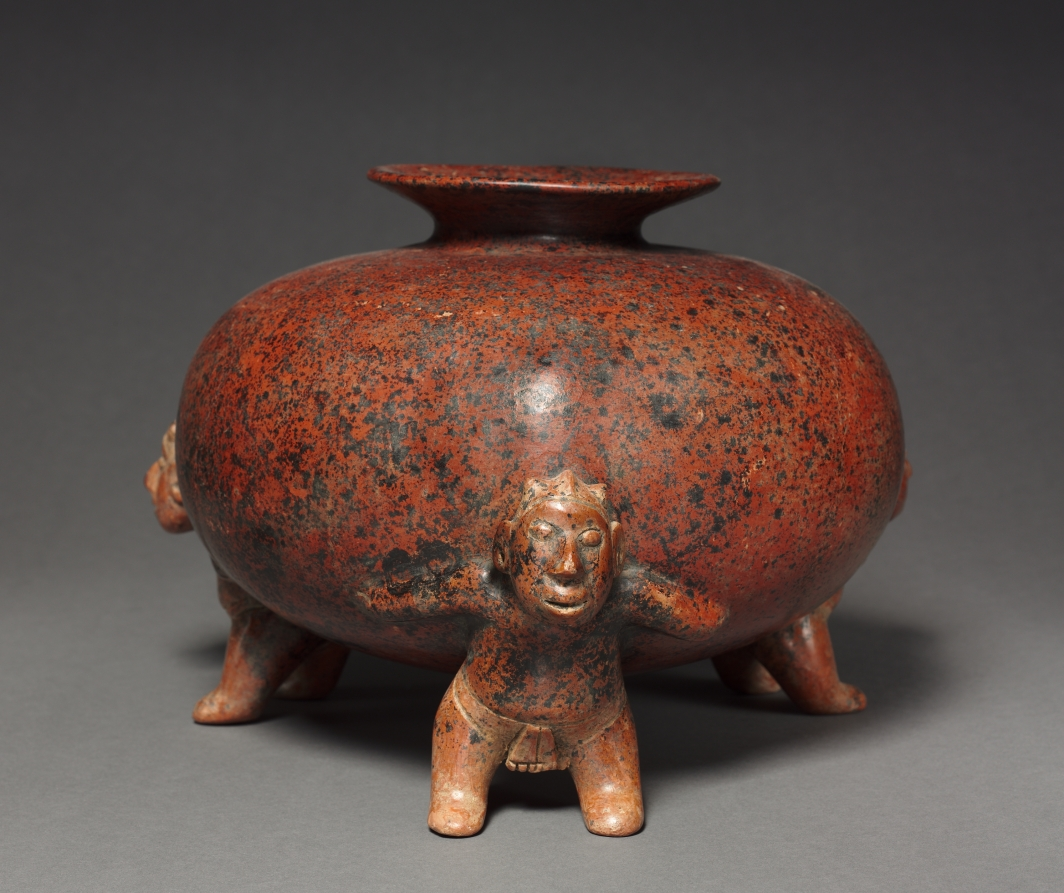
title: Vessel with Crested Atlantean (Supporting) FIgures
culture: West Mexico, Colima, Comala style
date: 200 BCE–300 CE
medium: earthenware with colored slip, black burial deposits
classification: Ceramic